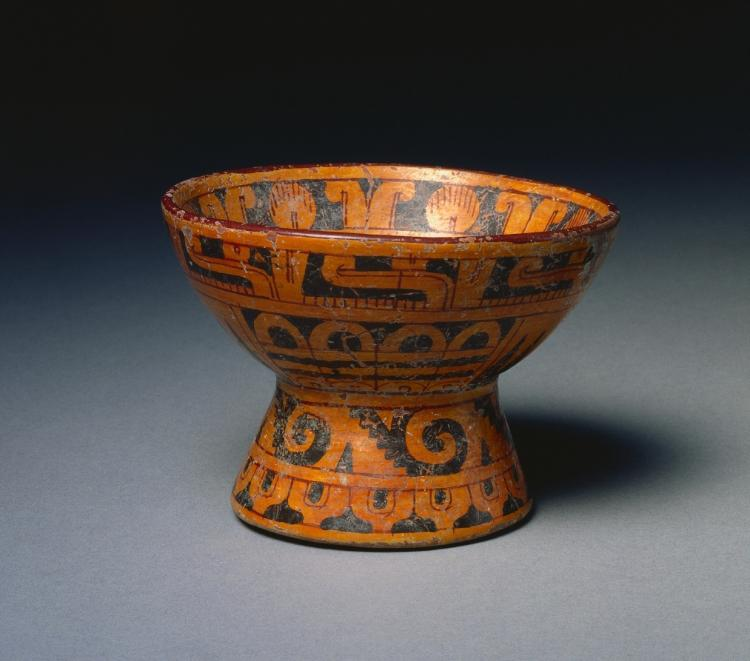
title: Bowl with Rattle Base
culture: Mexico, Cholula?, Mixteca-Puebla Style, 10th-16th century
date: c. 900–1519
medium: earthenware with colored slips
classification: Ceramic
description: The nobility may have used these goblets for a chocolate beverage or for pulque, made from the fermented sap of the maguey cactus. Both are painted with the precision and brilliant colors for which the Mixteca-Puebla style is renowned, and they carry some of the same motifs, such as the band of stylized animal heads at the top. The smaller bowl has a rattle base.